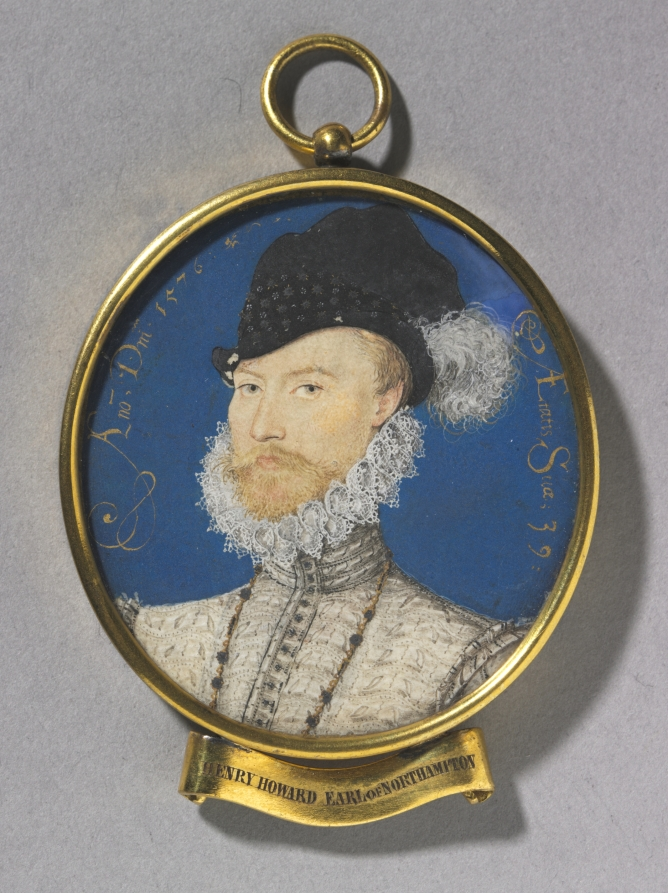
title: Portrait of Charles Howard, 2nd Baron Howard of Effingham, later 1st Earl of Nottingham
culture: England, 16th century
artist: Nicholas Hilliard (English, c. 1547–1619)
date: 1576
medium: watercolor on vellum in a gilt metal frame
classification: Portrait Miniature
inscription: inscribed from left: Ano, Dm. 1576: / AEtatis Suae; 39.